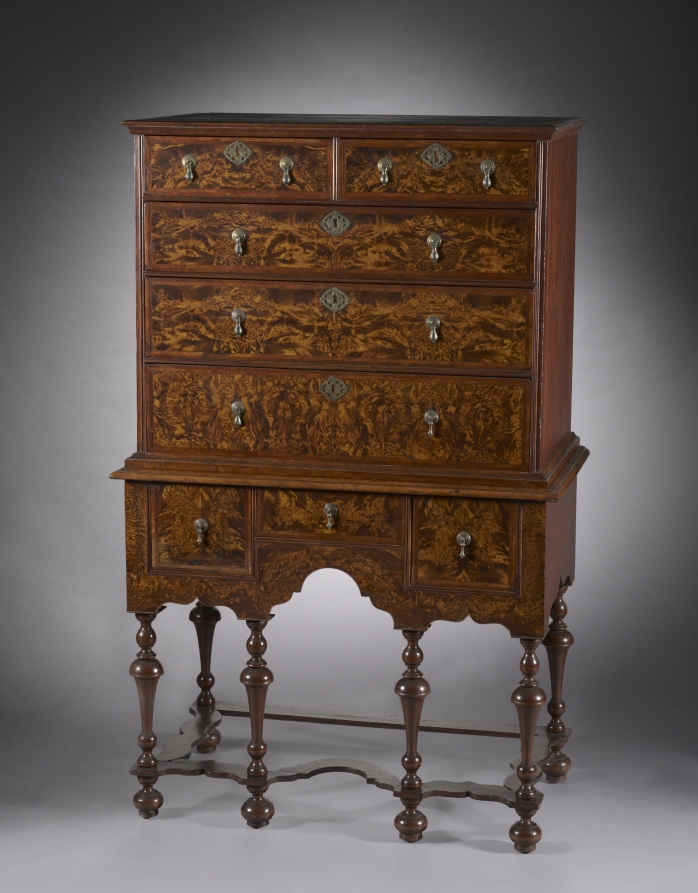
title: Highboy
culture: America, Massachusetts, William and Mary style, 18th century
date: 1700–1720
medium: burled maple veneer with walnut herringbone bandings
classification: Furniture and woodwork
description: One of the most notable developments in American furniture around 1700 was the introduction of "highboys" --- tall chests of drawers on high stands. These chests, often with bases having elaborately turned legs connected by a framework of stretchers, resemble closely English examples of the late 1600s during the reign of William and Mary. The decoration consists almost entirely of thin layers, or veneers, of richly patterned wood. These veneers were cut from burls (tumorlike growths on trees) and then carefully assembled and glued to create symmetrical patterns like those seen on the front of this highboy. The brass pulls on the drawers are typical of this period and may be original.